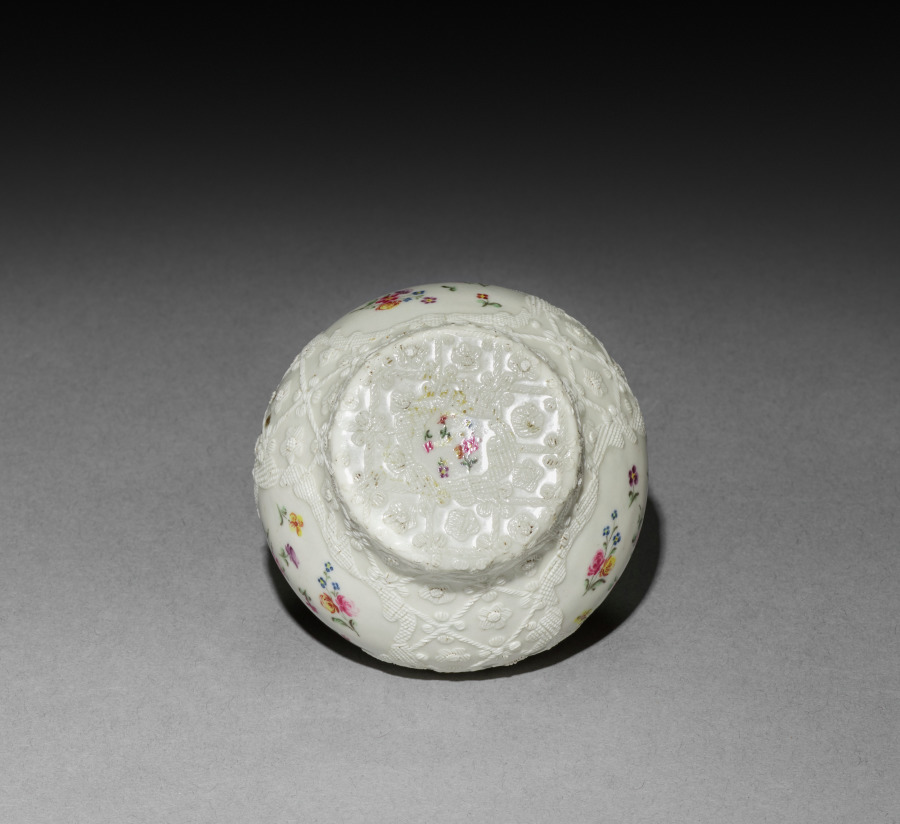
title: Box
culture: England, Staffordshire, 18th century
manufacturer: South Staffordshire Factory (British)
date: c. 1770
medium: enamel on copper with metal mounts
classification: Miscellaneous